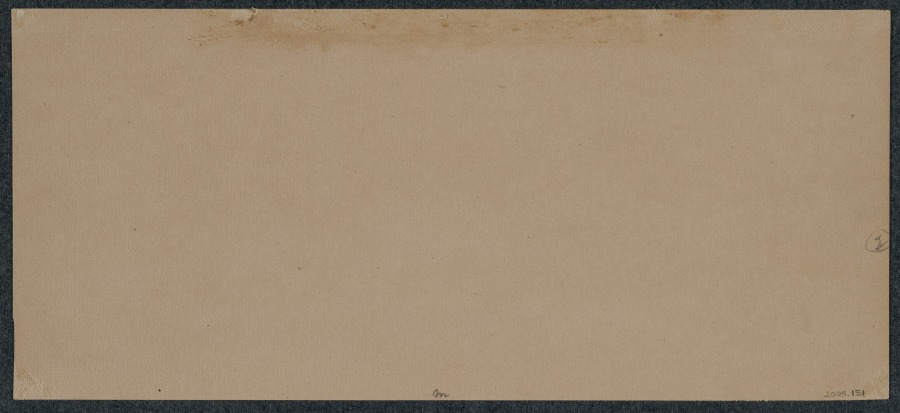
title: Entering Bergen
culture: England, 20th century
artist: Muirhead Bone (British, 1876–1953)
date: c. 1896–1953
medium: watercolor and graphite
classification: Drawing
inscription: Lower right, in graphite: Muirhead Bone